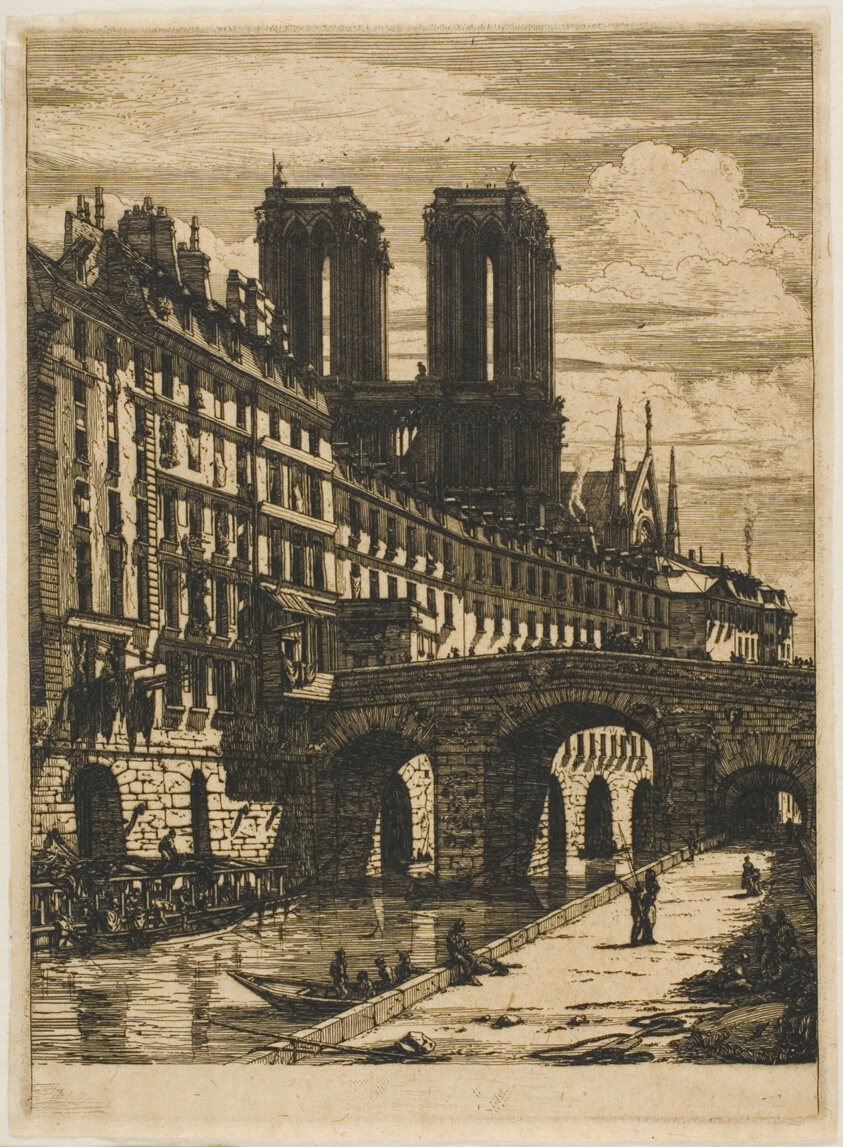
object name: Print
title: Le Petit Pont, Paris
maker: Charles Meryon (French, 1821-1868)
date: 1850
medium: Etching and engraving on tan wove chine, tipped onto ivory laid Japanese paper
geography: France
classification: etching; print; prints and drawing